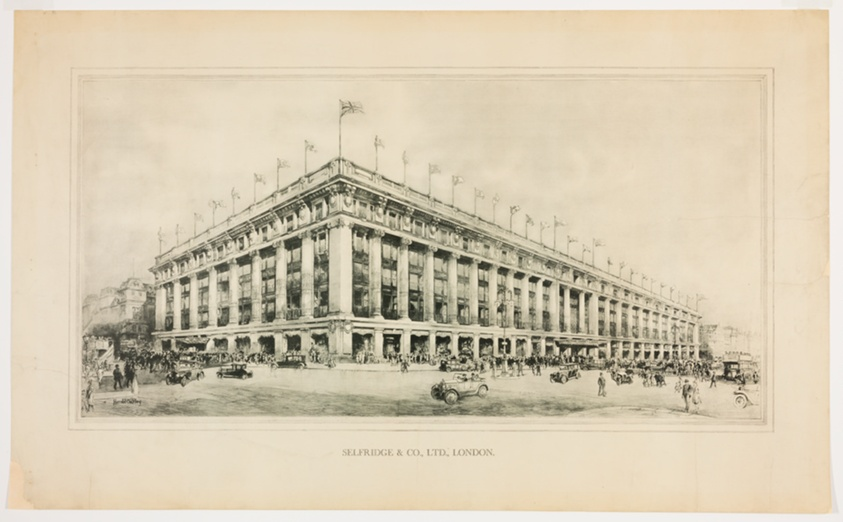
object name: Architectural Drawing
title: Selfridge & Co. Department Store, London, England, Perspective Rendering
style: 20th Century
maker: D. H. Burnham & Co.; American, 1896-1912; Delineator: Oakley, Harold; American, 20th cen.; Architect: Swales, Atkinson & Burnet, Associates; American, 20th cen.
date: 1906–1907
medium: Toned print on paper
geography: London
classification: architectural drawing; architecture; perspective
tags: storefronts, design, drawing, architecture, perspective, England, london